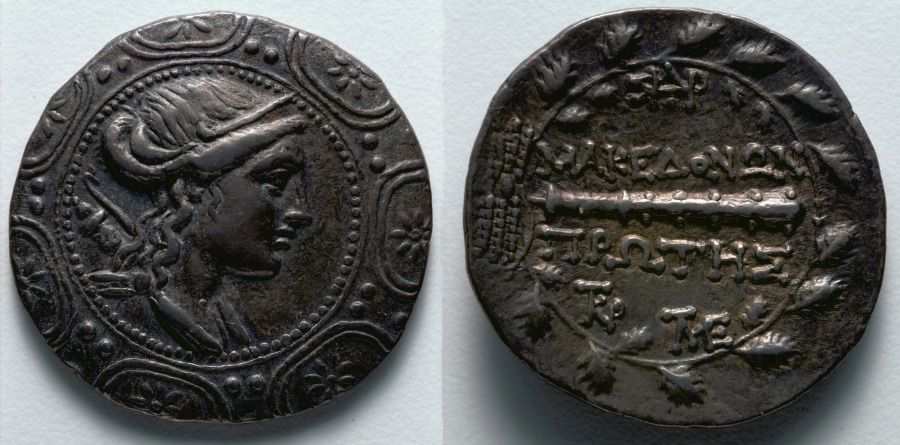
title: Tetradrachm: Macedonian Shield with Head of Artemis (obverse); Club (reverse)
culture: Greek, Macedonian, minted at Amphipolis (Macedonia), under Roman control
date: 158–150 BCE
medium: silver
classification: Coins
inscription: ΜΑΚΕΔΟΝΩΝ ΠΡΩΤΗΣ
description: Although Macedon was conquered by Rome in 168 BC, its mints continued to produce Hellenistic-style coinage. The obverse of this coin shows Artemis, identifiable by her bow and quiver, centered within an ornate Macedonian shield. On the reverse, a club is enclosed by a wreath and an inscription ascribing this coin to the first region of the Roman client state.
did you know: Three monograms around the border of the reverse identify officials responsible for producing this coin.